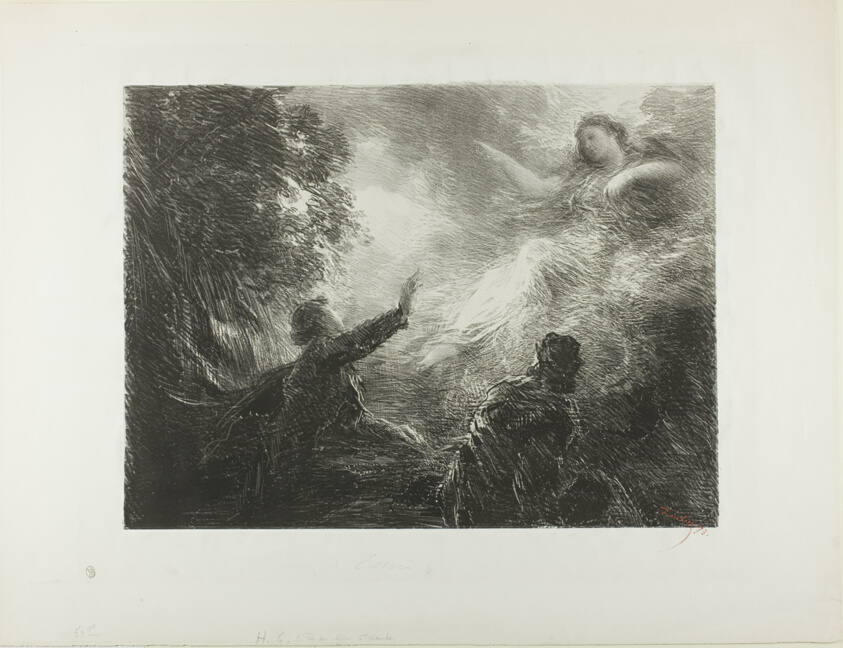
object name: Print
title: The Fairy of the Alps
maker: Henri Fantin-Latour (French, 1836-1904)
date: 1873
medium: Lithograph in black on ivory China paper laid down on white wove paper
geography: France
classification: lithograph; print; prints and drawing